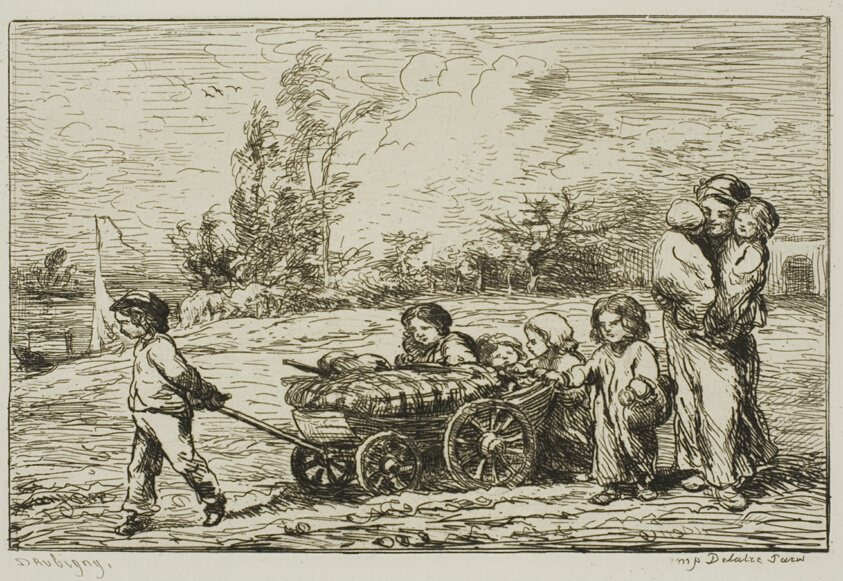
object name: Print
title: Moving in with the Wagon (The Furnishings of the Boat)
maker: Charles François Daubigny (French, 1817-1878)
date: 1861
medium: Etching on ivory laid paper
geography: France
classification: etching; print; prints and drawing